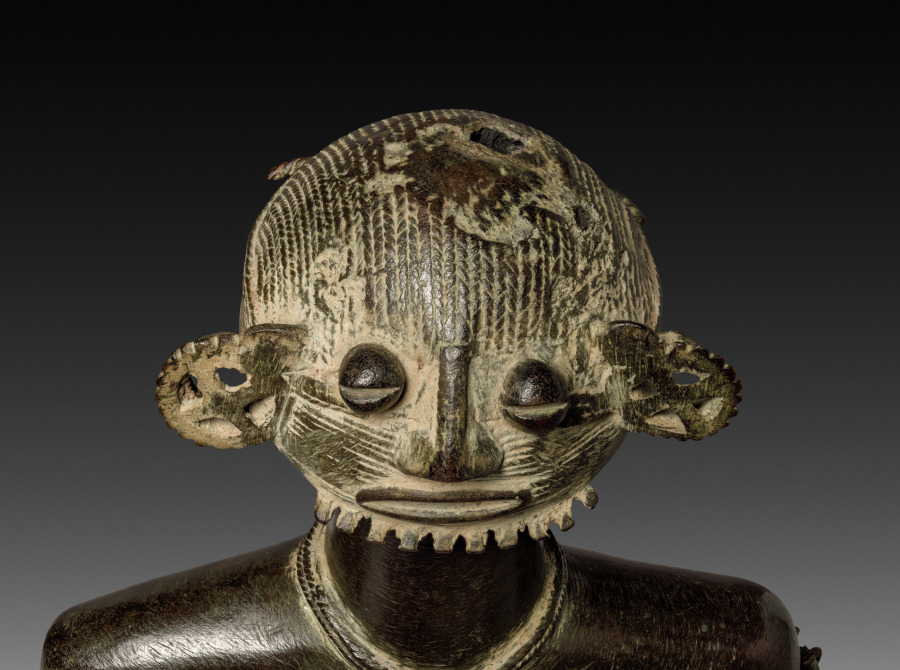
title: Male figure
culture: Africa, West Africa, Nigeria, Benue River Valley, Unidentified maker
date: probably 1800s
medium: Copper alloy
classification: Sculpture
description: Realized in a very distinctive style using the lost-wax method, this figure’s cultural origin and function is limited because it was removed from Nigeria during that country’s turbulent civil war of the late 1960s. Perhaps it was once part of an altar or shrine dedicated to a guardian or tutelary spirit. Connotations of prestige and wealth may explain why copper-alloy objects were diffused across vast territory and inherited over many generations.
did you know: Figurative copper-alloy objects like this sculpture point to intense trade and the circulation of people, goods, and technologies in the Benue River Valley, resulting in a highly cosmopolitan society.